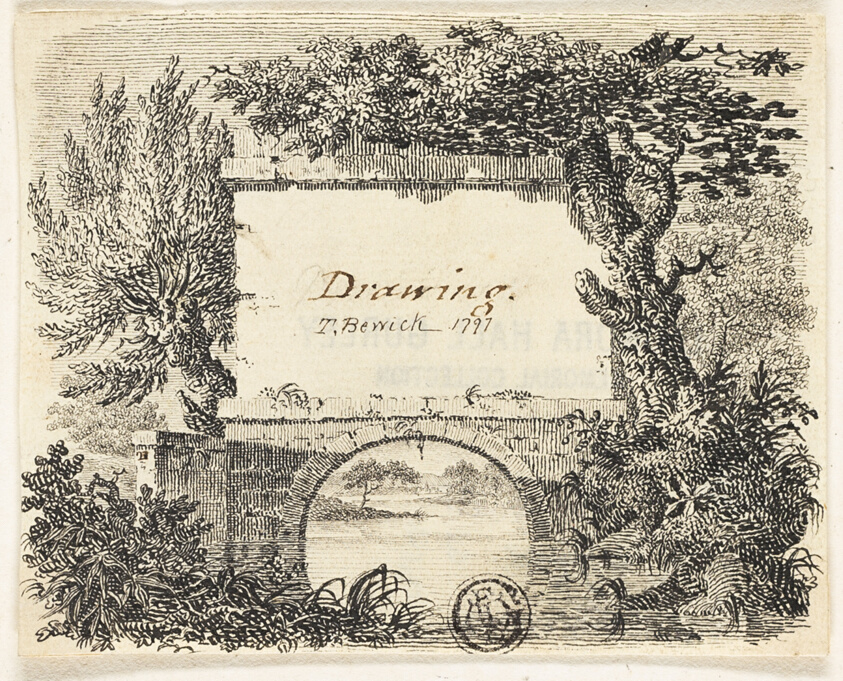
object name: Drawing and Watercolor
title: Vignette with Bridge Trees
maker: Attributed to Thomas Bewick; English, 1753-1828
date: 1797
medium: Pen and black ink on ivory laid paper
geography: England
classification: pen and ink drawings; drawings (visual works); prints and drawing